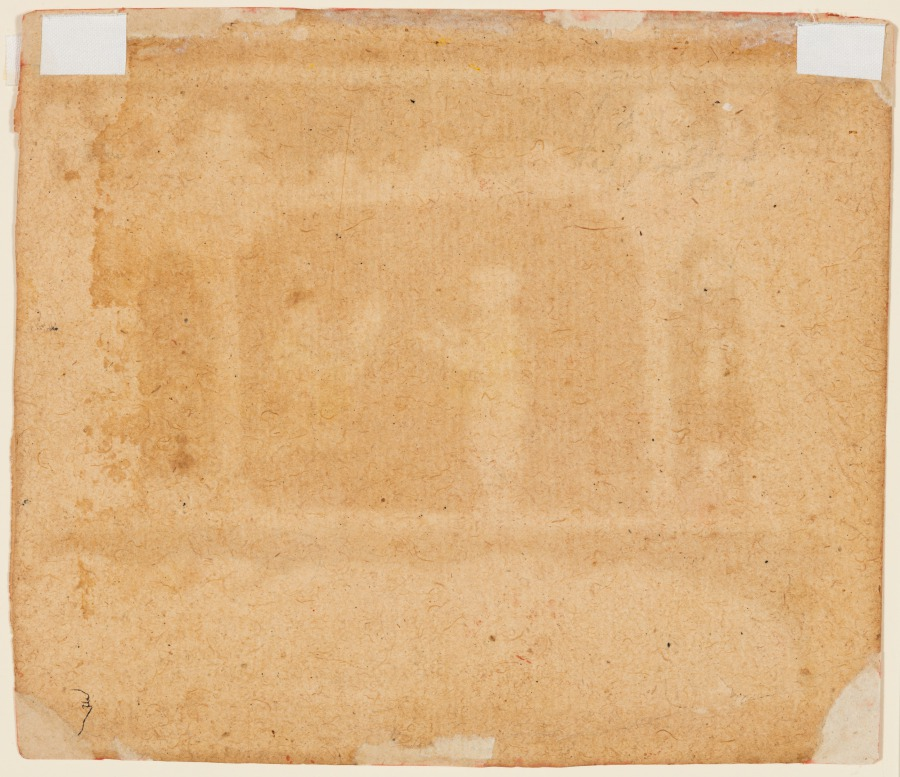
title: A Brahmin gives Krishna the Message or Invitation for the Competition to Rukmini’s Svayamvara, from a Bhagavata Purana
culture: Central India, Madhya Pradesh, Malwa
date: c. 1650–60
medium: Gum tempera and gold on paper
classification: Painting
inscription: vimra pātī daī rukumanī ke svayaṃvara ki, 53.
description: Sitting on a stool in a palatial setting, Krishna receives a letter, inviting him to participate in a ceremony called a svayamvara, in which an unmarried woman who has come of age selects a husband. Krishna will later elope with the princess Rukmini. This scene takes place in Krishna’s western palace of Dvaraka, by the ocean, which is depicted with waves and fish at the bottom of the page.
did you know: The letter in Krishna’s hand repeats the name of “Rama,” another incarnation of Vishnu.